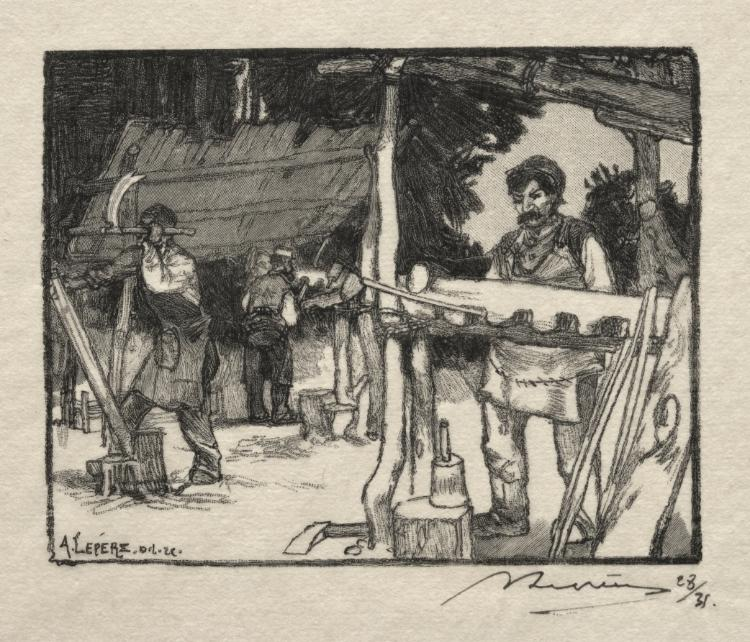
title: Le Fabricant de lattes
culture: France, 19th century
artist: Auguste Louis Lepère (French, 1849–1918)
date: 1889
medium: wood engraving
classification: Print